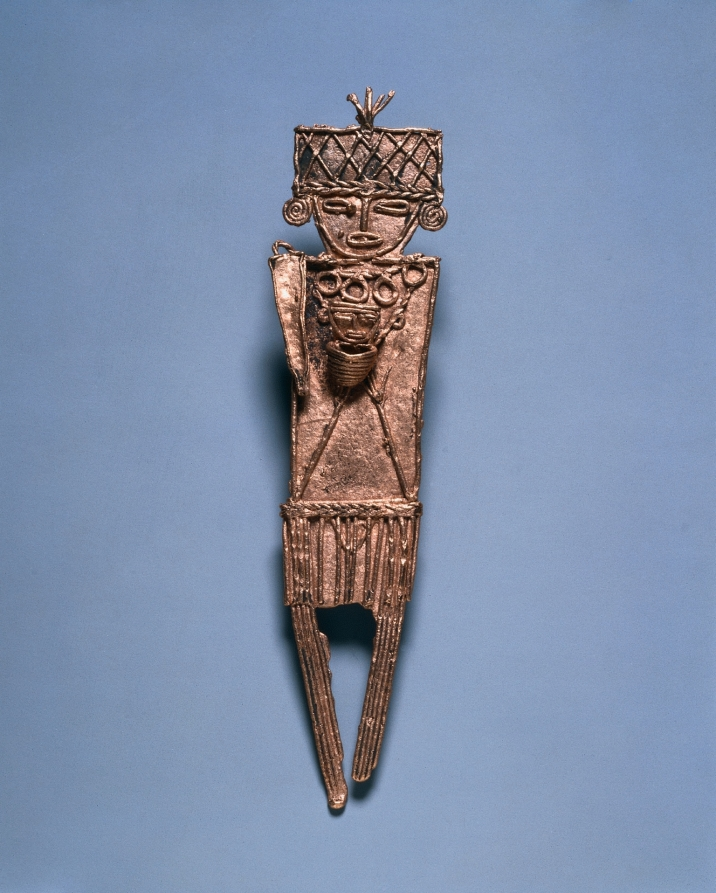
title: Tunjos (Votive Offering Figurine)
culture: Colombia, Muisca style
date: c. 900–1550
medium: cast gold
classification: Metalwork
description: Unlike the other gold ornaments made in the isthmian region, tunjos were not worn; instead, they served as offerings that were deposited in sacred places such as lagoons and caves. They often depict humans who hold something. Perhaps because they were not meant for display, tunjos were not finished after lost-wax casting. Flaws remain uncorrected, surfaces are unpolished, and gold that backed into the channel used to pour the molten metal into the mold was left in place.